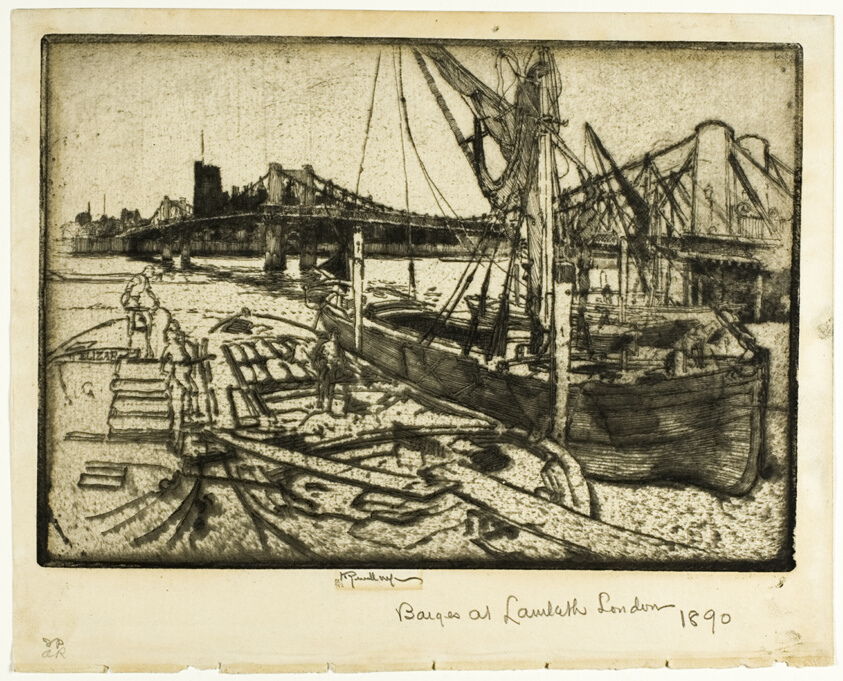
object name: Print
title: Chelsea, No. II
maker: Joseph Pennell (American, 1857-1926)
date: 1886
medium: Etching on ivory wove paper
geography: United States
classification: etching; print; prints and drawing